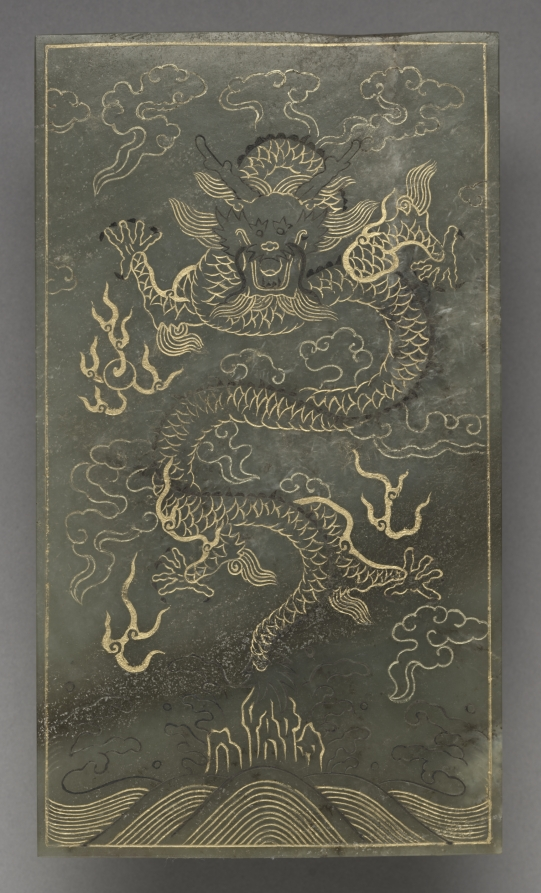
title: Tablet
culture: China, Qing dynasty (1644–1911), Qianlong reign (1736–95)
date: 1778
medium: jade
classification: Jade